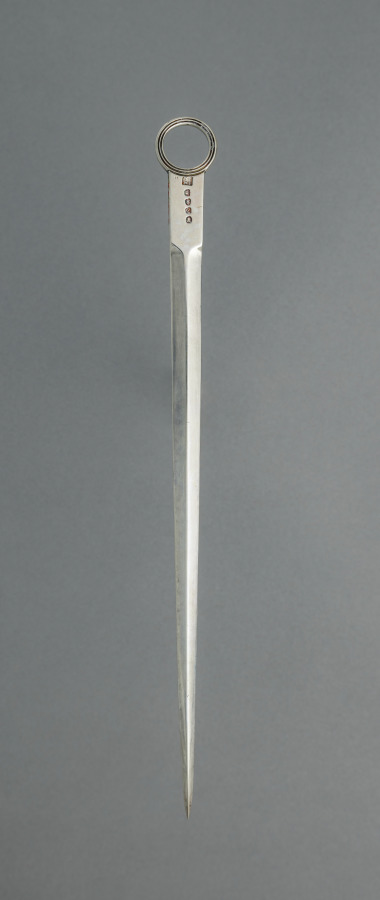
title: Skewer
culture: England, 19th century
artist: firm of William Eley (British)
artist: firm of William Fearn (British)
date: 1818–1819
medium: silver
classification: Silver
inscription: engraved crest on one side.